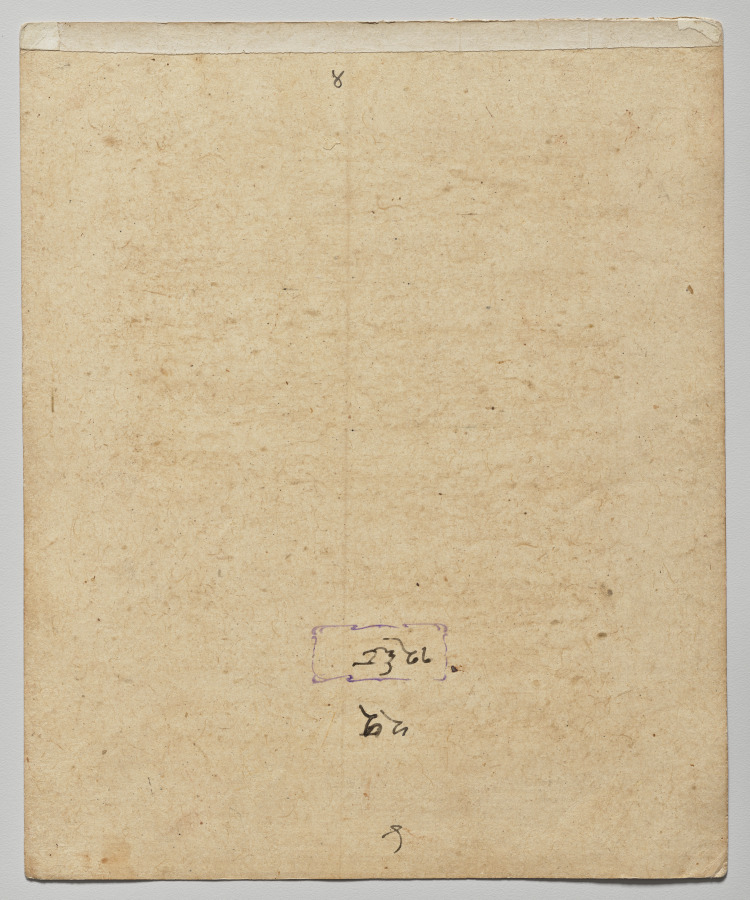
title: Mars, from a Mandi Astrology Series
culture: Northern India, Pahari kingdoms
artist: attributed to Sanju (Indian, active late 1700s–early 1800s)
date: c. 1810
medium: Gum tempera and gold on paper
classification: Painting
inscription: On the verso is the number four, in devanagari notation, written on the top and bottom edges.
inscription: The purple stamp of the kingdom of Mandi’s royal library bears the handwritten number 1268. Above is the number 22.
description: This page is from a series of paintings featuring astrological subjects, including personifications of planets and signs of the zodiac. Historically in India, the auspicious conjunction of planets with certain calendar dates was important for determining when to schedule events or ceremonies. Mars is depicted as a warrior with green skin and riding a tiger through the sky.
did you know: The god Mars in Roman mythology is also a warrior.